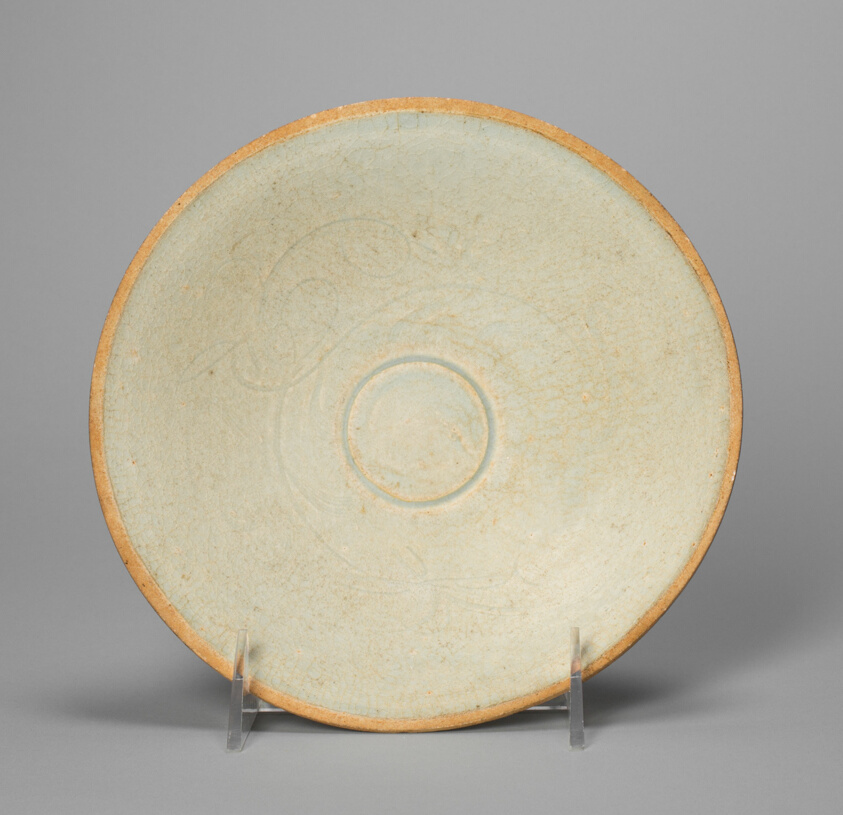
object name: Vessel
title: Bowl with Floral Scrolls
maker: China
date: Song dynasty (960–1279)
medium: Stoneware with underglaze carved decoration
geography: China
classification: ceramics; asian art